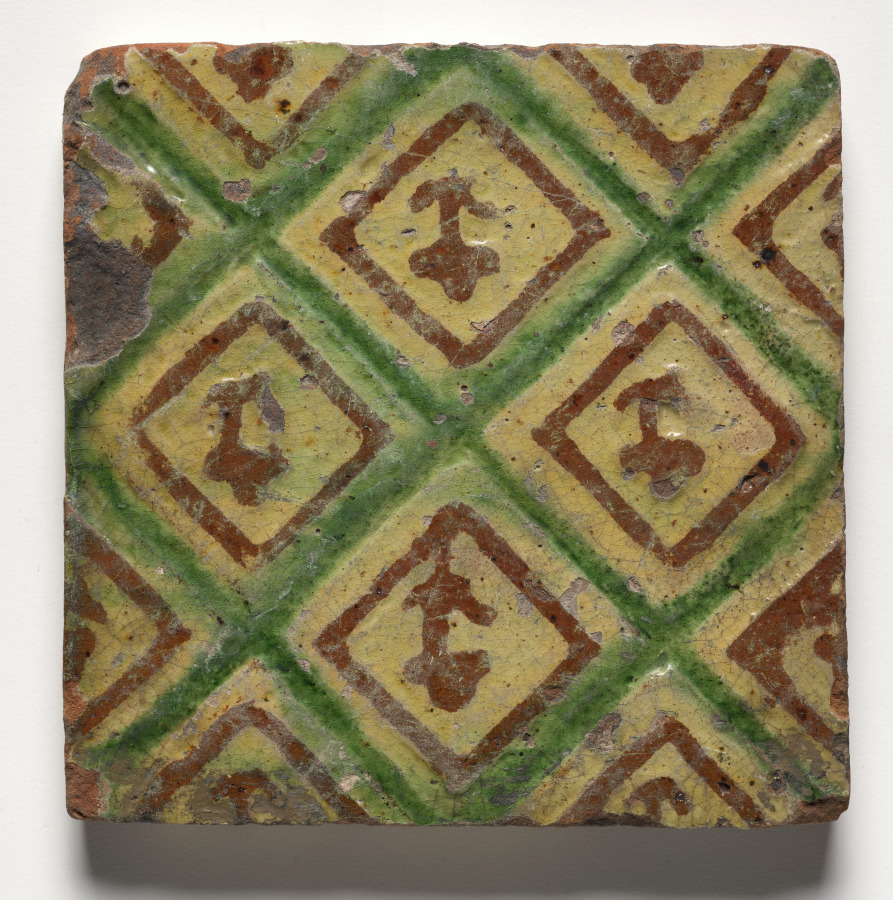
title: Tile- Diamond Interlace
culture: Netherlands, Holland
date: c. 1700s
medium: glazed ceramic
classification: Ceramic